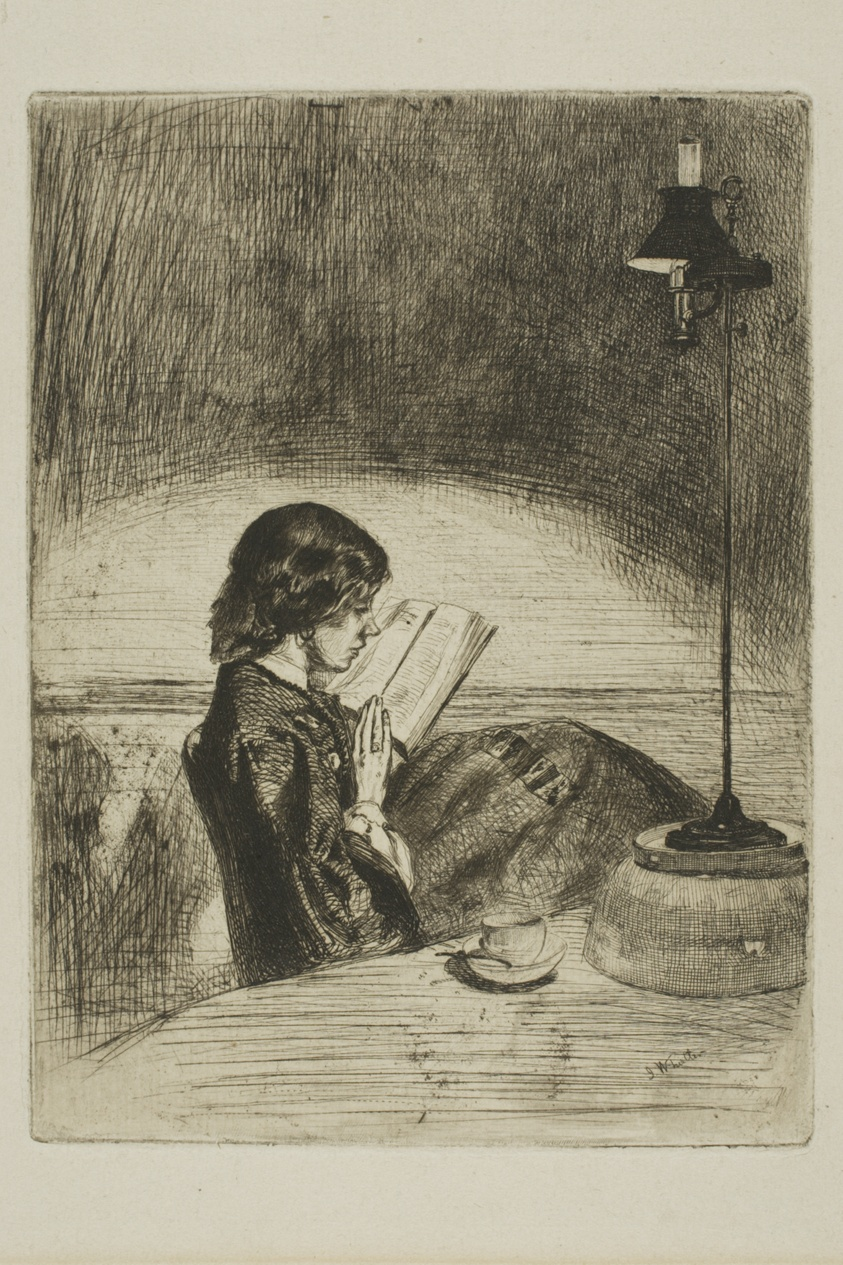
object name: Print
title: Reading by Lamplight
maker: James McNeill Whistler (American, 1834-1903)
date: 1859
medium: Etching and drypoint with foul biting in black ink on ivory laid paper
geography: United States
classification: etching; foul biting; drypoint; print; prints and drawing; paper